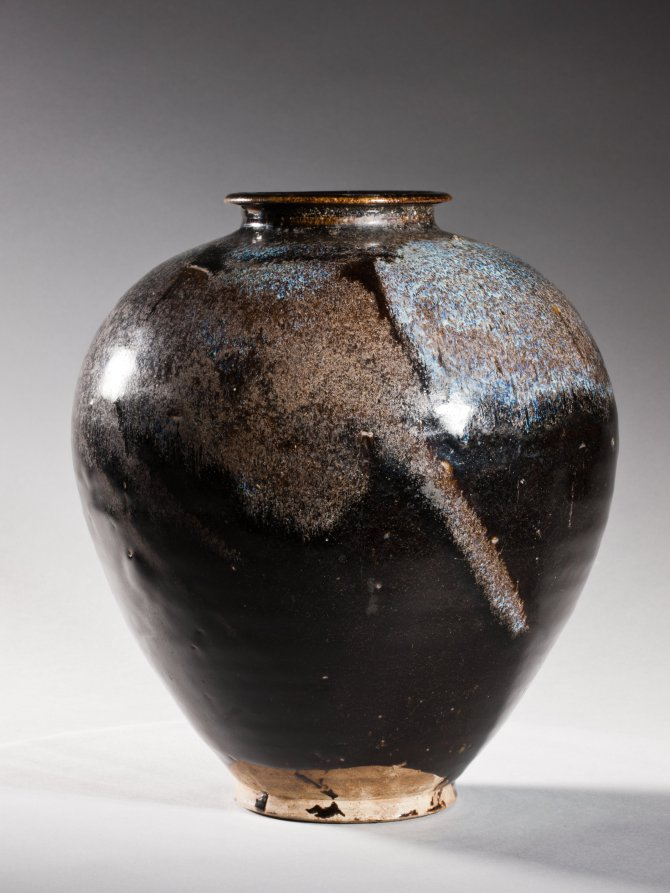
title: Jar: Black Ware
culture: China, Henan province, Huangdao kilns, Tang dynasty (618-907)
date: 700s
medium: glazed stoneware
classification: Ceramic